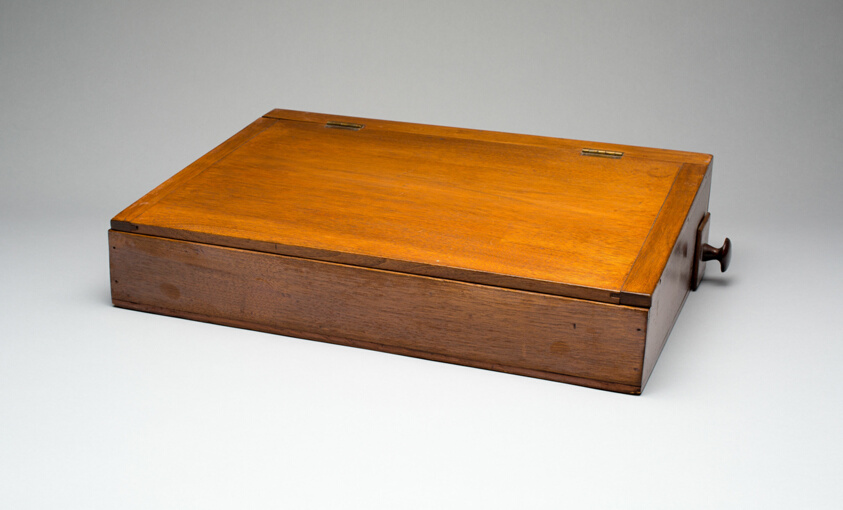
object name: Decorative Arts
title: Writing Box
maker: Shaker Colony; American, 19th century; Watervliet, New York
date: 1825–60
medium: Chestnut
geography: Watervliet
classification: desk; box; furniture; american decorative arts; american arts; decorative arts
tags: furniture